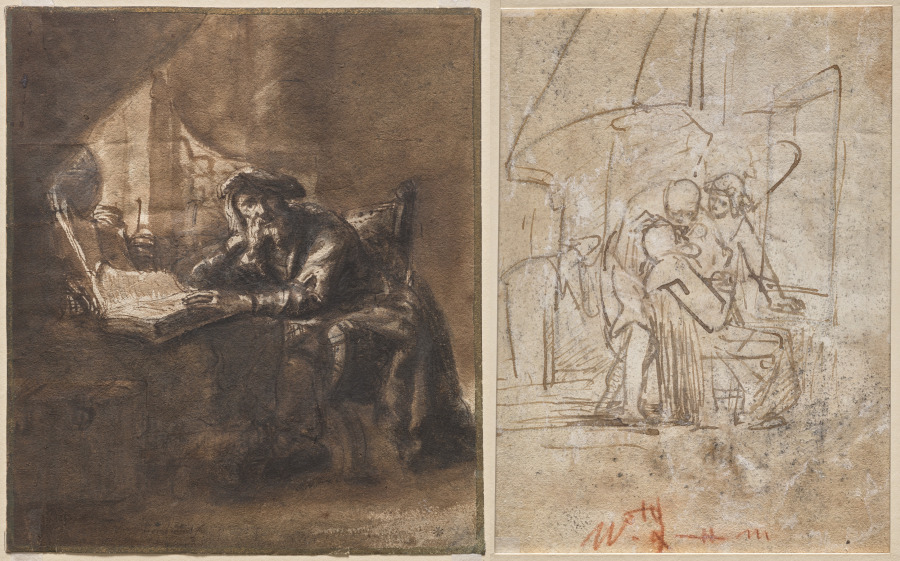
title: An Old Man Seated at a Table, His Head Resting on His Right Hand (recto); The Healing of Tobit (verso)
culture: Netherlands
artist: Ferdinand Bol (Dutch, 1616–1680)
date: c. 1640s–50s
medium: Pen and brown ink, brown wash, black ink framing lines (recto); pen and brown ink (verso)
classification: Drawing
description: Ferdinand Bol was one of the most prominent pupils and followers of Rembrandt van Rijn, for whom drawing played a central role in his workshop practice and teaching. This image of a man within a darkened interior before a window—perhaps a scholar or philosopher—is similar to compositions of saints as well as portraits that Rembrandt made in the 1630s and 1640s. Bol was quite interested in the theme, portraying similar figures in at least two paintings, ten drawings, and four etchings. Like Rembrandt, he employed an expressive but controlled use of ink wash, emphasizing the psychological interiority of the sitter with dramatic shading. The verso (back) of the drawing features a quick sketch by Bol after another of Rembrandt’s compositions, Tobit Healing his Father’s Blindness, 1640–45, held today in the CMA’s collection (1969.69).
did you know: Ferdinand Bol’s subtle and controlled use of ink wash reveals a large trunk on the floor, while retaining bright highlights on the figure, book, and globe on the windowsill.